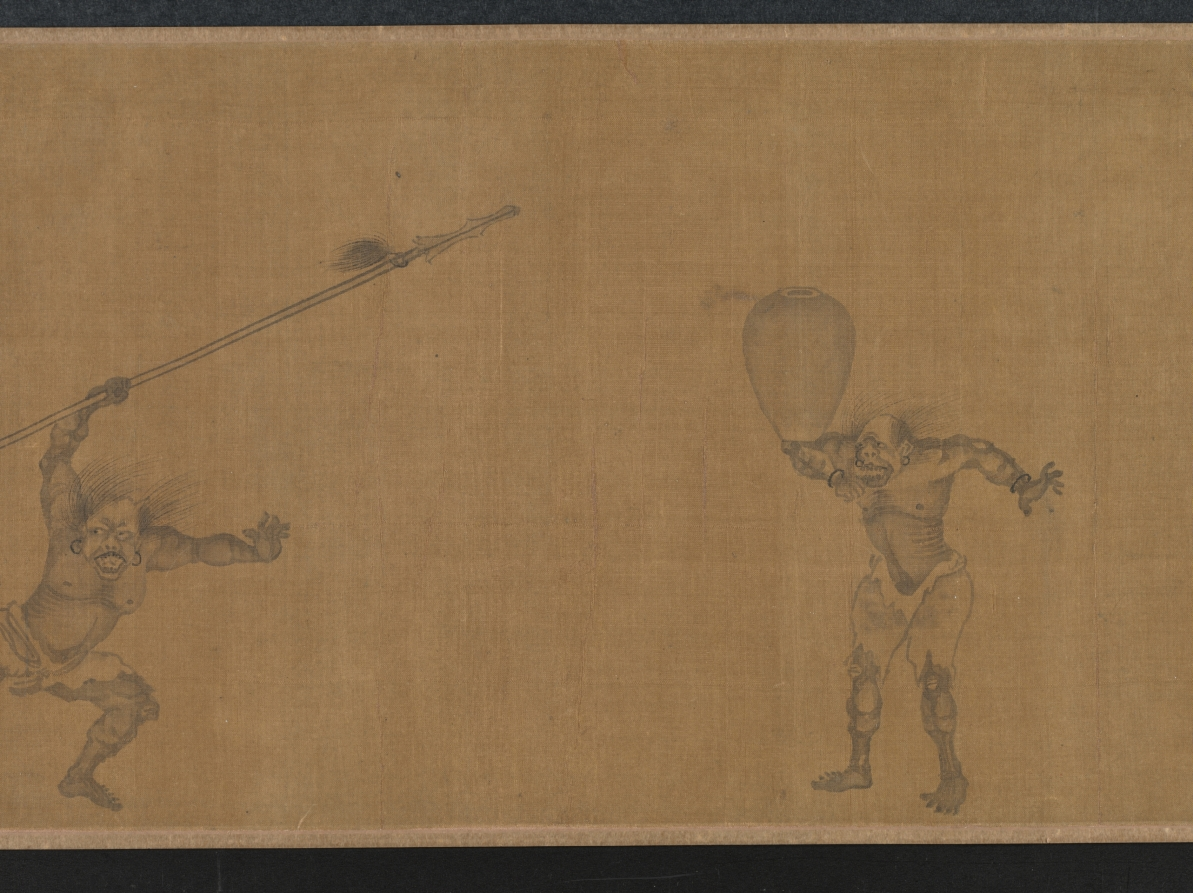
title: The Lantern Night Excursion of Zhong Kui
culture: China, Yuan dynasty (1271-1368)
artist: Yan Hui (Chinese, active 1270–1310)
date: late 1200s–early 1300s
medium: handscroll; ink and slight color on silk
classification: Painting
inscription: Artist's signature [and probable seal]: Yan Qiuyue 顏秋月 Title on frontispiece and 1 seal of Niu Shuyu 鈕樹玉 (1760–1827): Qiuyue mohuan 秋月墨幻 [Qiuyue's Ink Fantasy]. 31 additional seals: 2 of Yang Shiqi 楊士奇 (1365–1444); 2 of An Guo 安國 (1481–1534); 8 of Xiang Yuanbian 項元汴 (1525–1590); 2 of Geng Zhaozhong 耿昭忠 (1640–1686); 4 of Pu Tung 溥侗 (1870–1952); 7 of Tan Jing 譚敬 (1911–1991); 1 of Liu Ting-chih (20th c.); 5 unidentified.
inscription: An inscription by Zizhi Shanren 紫芝山人 [probably Jiang Hui 蔣惠], dated 1389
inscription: An inscription by Wu Kuan 吳寬 (1436–1504)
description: Here, the demon queller Zhong Kui leads a nightly procession of street entertainers with bare, muscular bodies and demonic faces. Some wear shabby clothes, and all perform stunts and tricks to astound and scare the viewer. In fact, a New Year custom in cities of southeast China had the poor, disguised as demons, process through the streets and play their tricks to clear households of evil spirits and welcome the spring. From right to left, a demonic figure leads the procession and beats a drum; another lifts a large rock; one stands on his hands trying to drink; one balances a jar on his elbow; three hold and wield weapons; one carries a folded chair covered by a cow’s skin; another holds Zhong Kui’s qin (zither), books, brush, and inkstone. At the end of the scroll, two figures offer a cup and bottle of wine to Zhong Kui, who lifts his hand in command.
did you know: Zhong Kui was an ancient ghostbuster.